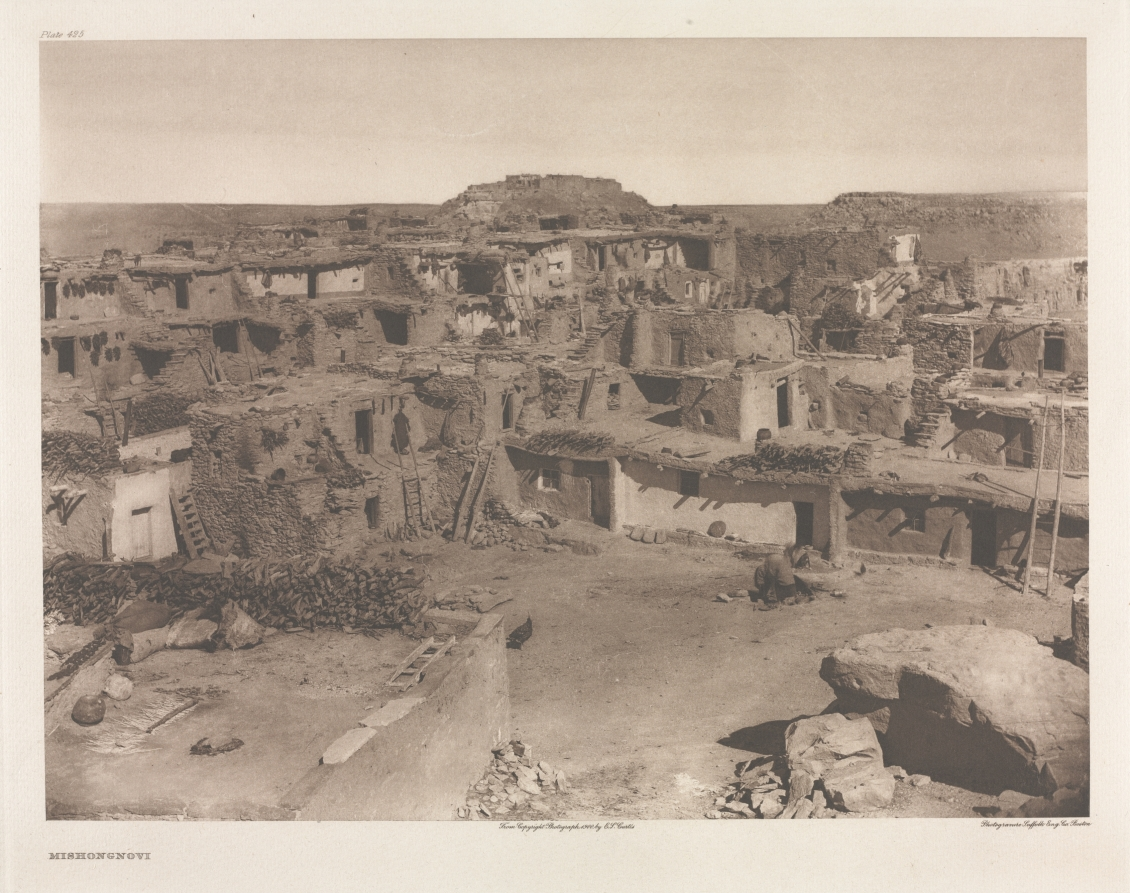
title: Portfolio XII, Plate 425: Mishongnovi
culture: America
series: The North American Indian: being a series of Portfolios picturing and describing the Indians of the United States, the Dominion of Canada, and Alaska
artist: Edward S. Curtis (American, 1868–1952)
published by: The University Press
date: 1900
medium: photogravure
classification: Portfolio